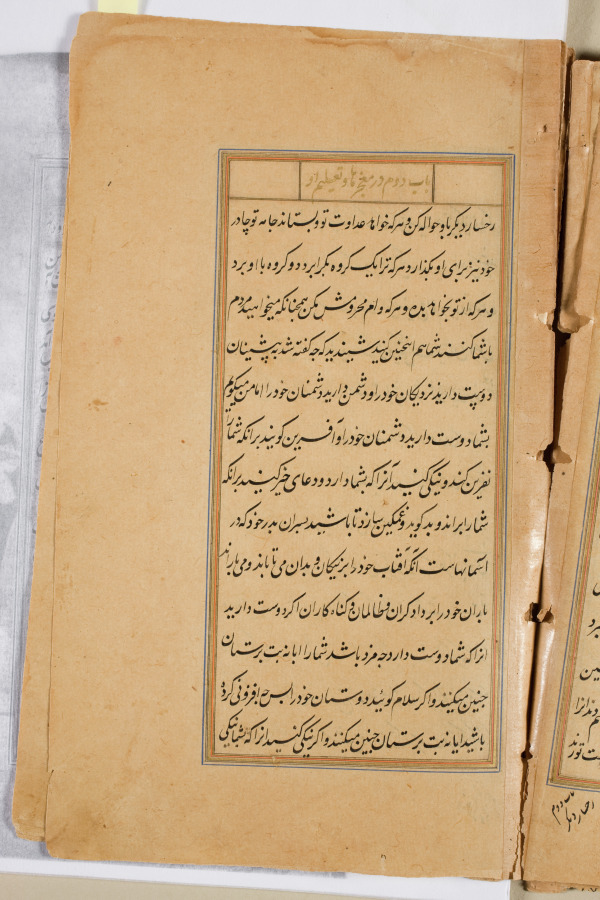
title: Text page from a Mirror of Holiness (Mir’at al-quds) of Father Jerome Xavier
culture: Mughal India, Allahabad, made for Prince Salim (1569–1627)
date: 1602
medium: Ink and gold on paper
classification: Manuscript